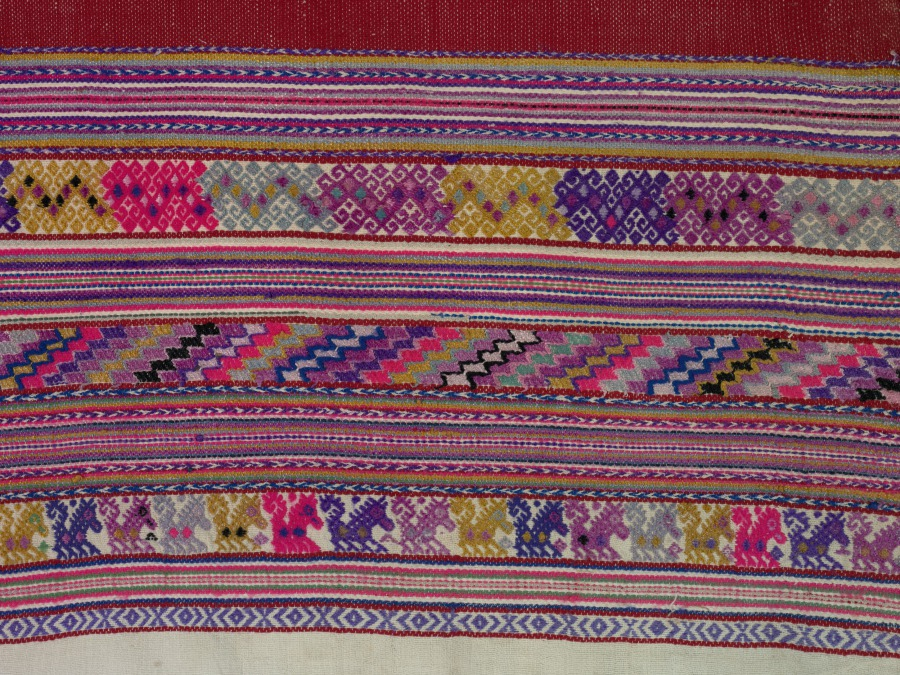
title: Huipil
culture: Guatemala, Quetzaltenango, late 19th or early 20th century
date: late 1800s or early 1900s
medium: woven wool and embroidered wool and silk on cotton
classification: Textile